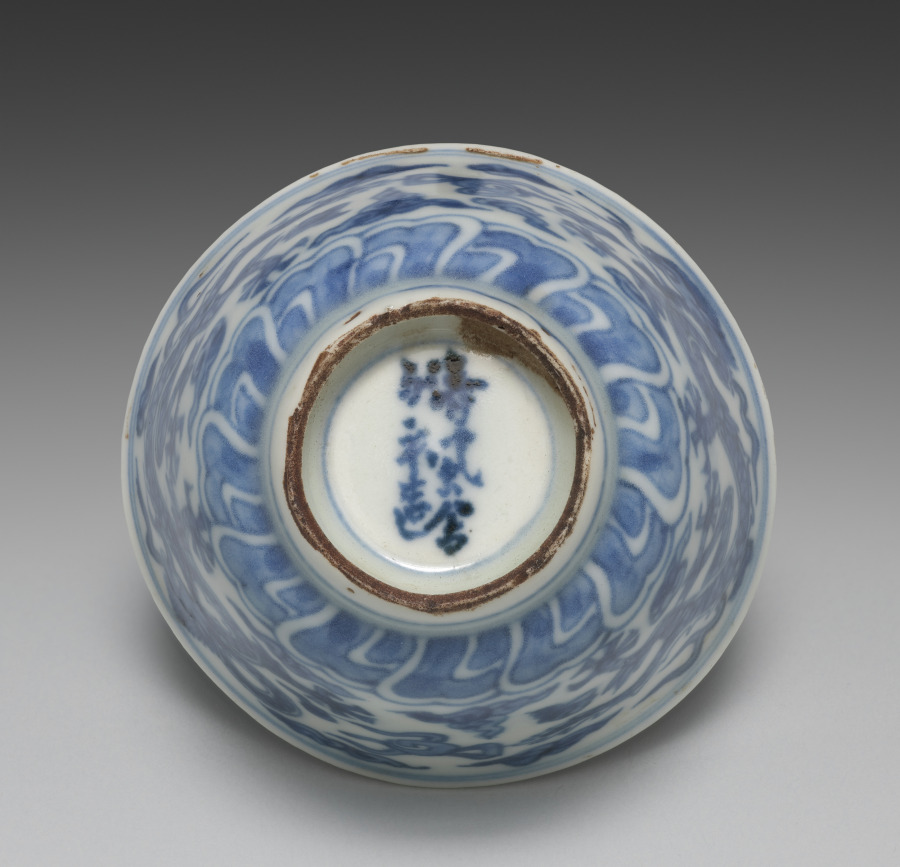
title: Cup from Tea Cups with Dragons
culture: Japan, Edo period (1615–1868)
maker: Seifū Yohei I (Japanese, 1801–1861)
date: 1840s–57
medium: One from a set of five tea cups; porcelain with underglaze blue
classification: Ceramic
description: Seifū Yohei I made both blue and white porcelains after Ming dynasty (1368–1644) Chinese wares fired in the kilns at Jingdezhen for export. He also made colorful stoneware in the style of his teacher, Nin’ami Dōhachi (Takahashi Dōhachi II) (1783–1855).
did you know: A small figure of an elephant serves as the handle for the lid.